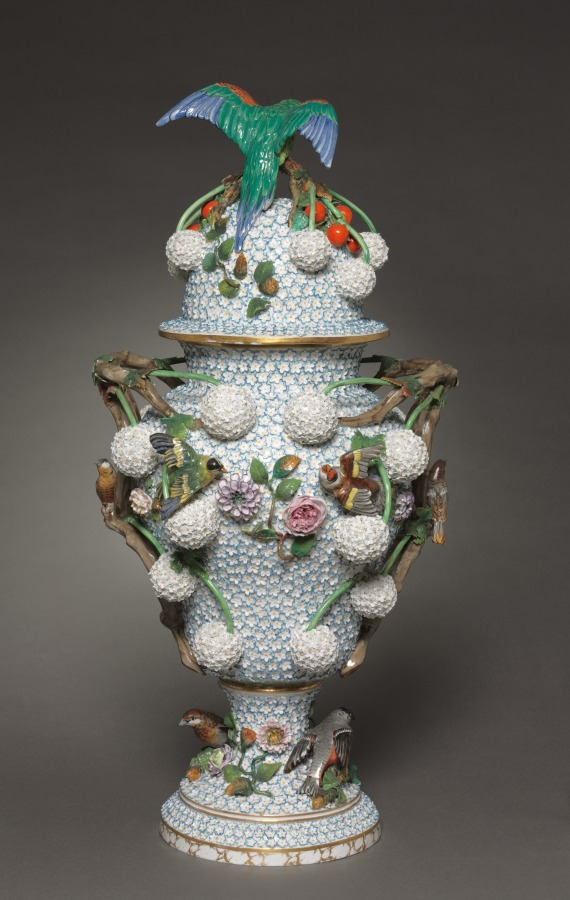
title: Vase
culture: Germany, 19th century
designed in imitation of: Meissen Porcelain Factory (German, est. c. 1710)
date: 1850–1899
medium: porcelain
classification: Ceramic